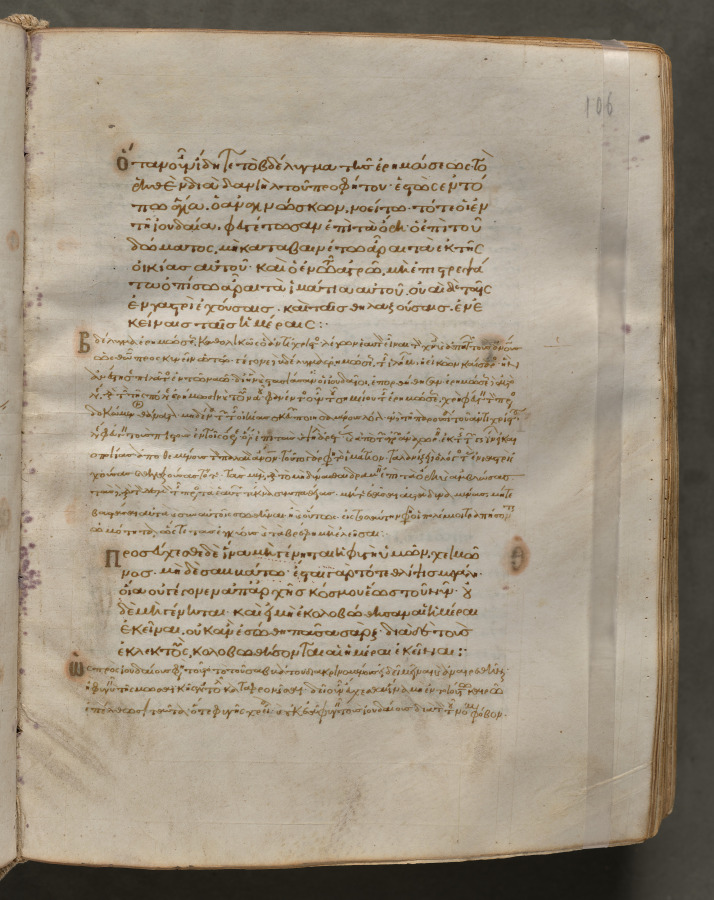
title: Text, folio 106 (recto), from a Gospel Book with Commentaries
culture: Byzantium, Constantinople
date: c. 1000–1100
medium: ink, tempera, and gold on vellum; leather binding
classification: Bound Volume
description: Each of the four gospels in this book opens on a page with brilliantly illuminated borders depicting the author of the text as well as birds-principally peacocks, symbols of the immortality of the soul-and fountains, representing the fountain of life and the salvation of the soul. This volume consists of 428 leaves with texts in Greek. Its level of sophistication suggests that it was probably written and decorated in a monastery in Constantinople.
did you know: Gospel Books were carried in procession through Byzantine churches.